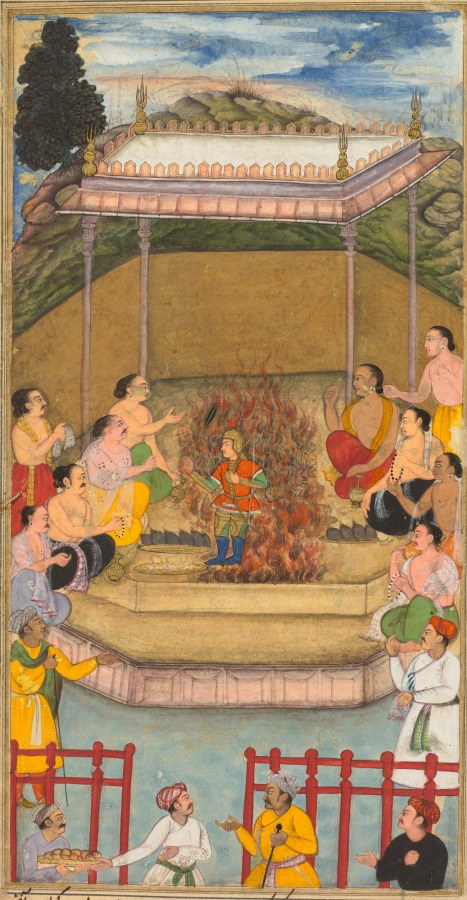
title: Yaja and Upayaja perform a sacrifice for the emergence of Dhrishtadyumna from the fire, from Adi-parva (volume one) of the Razm-nama (Book of Wars) adapted and translated into Persian by Mir Ghiyath al-Din Ali Qazvini, known as Naqib Khan (Persian, d. 1614) from the Sanskrit Mahabharata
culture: Mughal India; made for Abd al-Rahim the Khan Khanan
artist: attributed to Bilal Habshi (probably Ethiopian, active late 1500s)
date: 1598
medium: Gum tempera, ink, and gold on paper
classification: Painting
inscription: Inscriptions around painting: Ascribed to Bilal Habashi (probably Ethiopian, active late 1500s) Mughal court, made for Abd al-Rahim the Khan Khanan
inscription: Persian inscription in bottom margin, in nasta‘liq script: The performing of a sacrifice by King Drupada with Yaja and Upayaja and the appearing of Dhrishtadyumna and Draupadi from the fire; Bilal-i Habashi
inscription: Persian inscription at edge of bottom margin, in nasta‘liq script: and sword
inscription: Calligraphy: Persian text in naskh script: “. . . and rules in Panchala. I want you to take him and bring him to me.” They went to war with Drupada and fought a battle, and King Drupada managed to overcome the Kauravas and put them to flight, but the Pandavas fought him and brought him to Master Drona. Droṇa took half of his [Drupada’s] kingdom from him and left him the other half. King Drupada was extremely distressed that Master Drona had overcome him and wished he could have an offspring who would kill Master Drona. With this desire in his mind, he went to the shores of the Ganges River so that perchance he could find a person whose prayers on his behalf to the almighty God to graciously bestow upon him an offspring capable of killing Droṇa would be accepted. By the banks of the Ganges he saw two pious worshipers. One was called Yaja and the other Upayaja. He spent some time there performing services for them and bringing them whatever they required. After a long while, one day he said to Upayaja: “I would like you to do what is needed so that I have a son who could kill Master Drona. If you do this I will give you one lakh [a hundred thousand] of cows and whatever else you demand.” Upayaja did not accept this. Once again Drupada spent time at their service, and then once again he begged Upayaja to do this. He said: “Go to my elder brother Yaja, since he still has a little attachment to this world, so that he can perform the sacrifice for you, so that the almighty God would bestow on you the offspring that you desire.” King Drupada went therefore to Yaja the brahmin and told him what Upayaja had told him and said: “If you perform the sacrifice for me so that I have son who would kill Master Drona, I would give you eighty thousand cows.” Yaja said, “What kind of a person is Master Drona that you do not deem yourself a match for him?” Drupada said, “Droṇa is the kind of person who remains without rival and peer in the arts of war. His bow is six times the length of the elbow to the fingertip, and nothing in the world can rival and overcome him.” Yaja said: “I will perform the sacrifice for you, so long as my brother Upayaja joins forces with me.” So King Drupada and Yaja both went to Upayaja and pleaded so long that he at last agreed to be present at the sacrifice. They thus made a wish for King Drupada to have a son to kill Droṇa and made a big sacrifice, and from the midst of the sacrificial fire suddenly a son emerged clad in a coat of mail holding a bow in one hand.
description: Fire sacrifice was central to the Indo-European people who entered the Indian subcontinent as early as 1800 BC. Only Brahmins, a social class of priests, had access to the sacred texts called the Vedas, which explained the meaning and process of the fire sacrifice, considered by orthodox Hindus as a way to communicate with the gods. A king named Drupada in ancient India sponsored this fire sacrifice in order to generate a powerful warrior who would be able to slay the enemy who took half his kingdom. Seated around an altar in the sacrificial enclosure, Brahmins pour oblations into the fire and recite the prayers necessary to generate the divine warrior Dhrishtadyumna, shown here in full battle armor at birth. The inscription below gives the title and the name of the artist, Habshi, which means “Ethiopian,” suggesting the presence of Africans in the royal Mughal workshop. The story of how the warrior Dhrishtadyumna was generated from the fire sacrifice is written on this page. When King Drupada lost half his kingdom to a military master named Drona, he needed a gift from the gods to defeat him: a new warrior born to accomplish this mission. In order to obtain this gift, King Drupada went to the banks of the Ganges to find two powerful Brahmins to whom the gods would respond favorably. After serving them faithfully and offering payment of 100,000 cows, the Brahmins Yaja and Upayaja agreed to perform the sacrifice. The text is written in a form of Arabic script, called naskh, in the Persian language, as translated from the original Sanskrit epic Mahabharata for emperor Akbar (r. 1556¬–1605). The passages of dialogue are written diagonally.